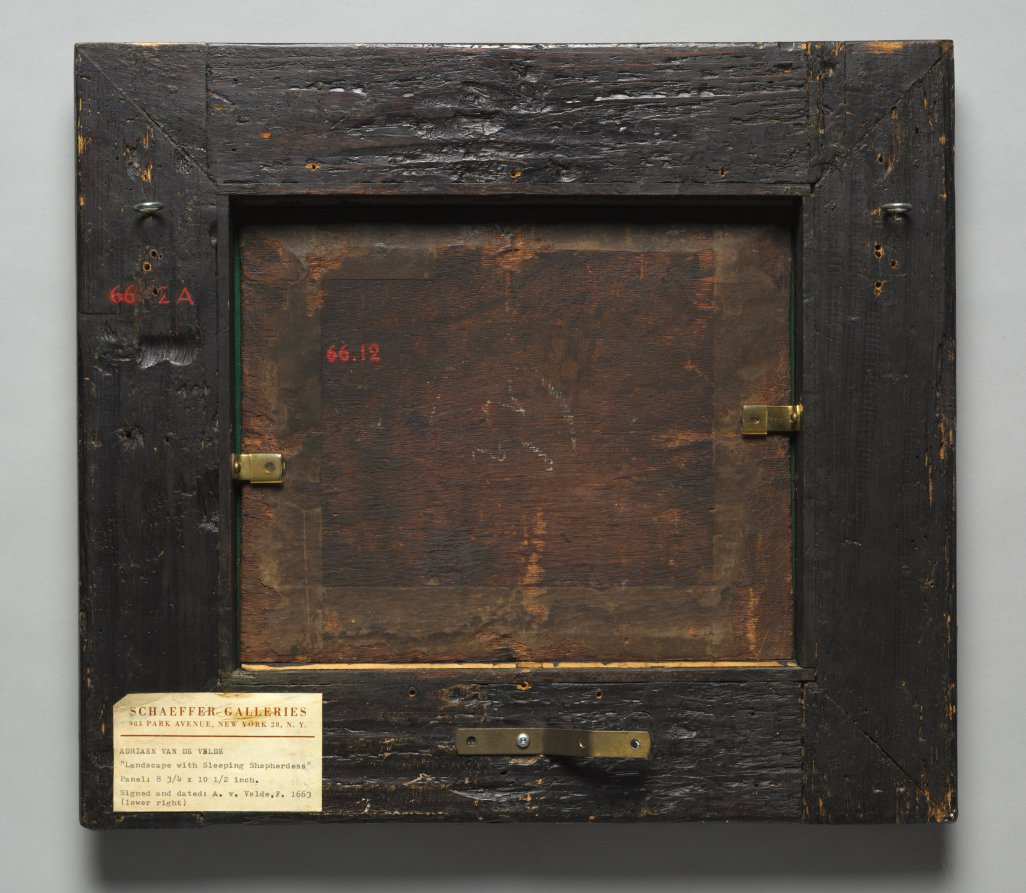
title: Sleeping Shepherds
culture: Netherlands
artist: Adriaen van de Velde (Dutch, 1636–1672)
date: 1663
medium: oil on wood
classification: Painting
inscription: Signed lower right: "A.v.Velde. f / 1663"